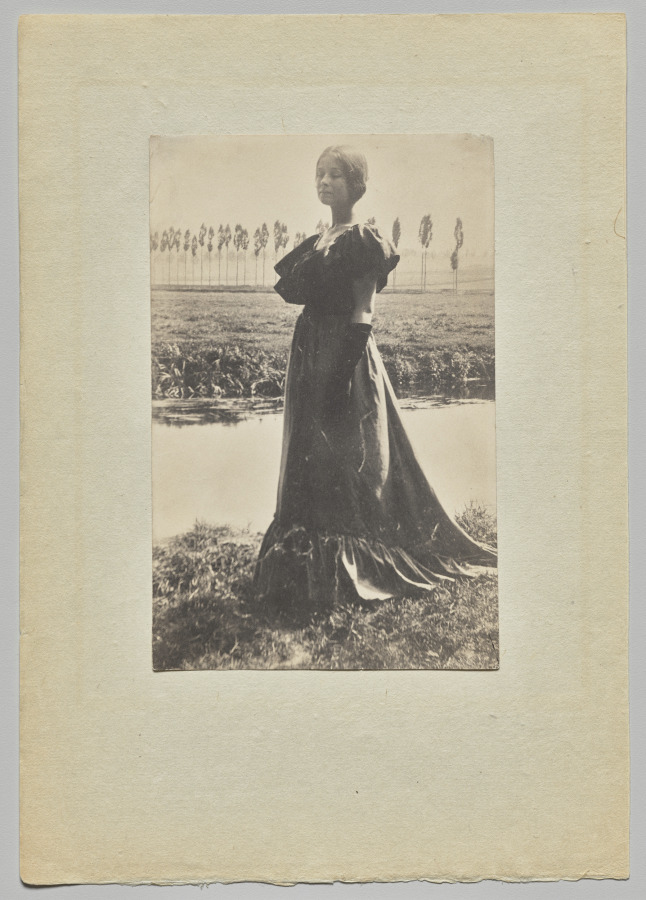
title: Italy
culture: America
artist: Gertrude Käsebier (American, 1852–1934)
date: c. 1889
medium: platinum print mounted to Japanese paper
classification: Photograph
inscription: Written in pencil on verso of photograph: Mar/7 x 10”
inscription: Written in pencil on verso of mount: “Kasebier x 1.08”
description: Italy provides insight into Käsebier’s earliest artistic productions. The woman’s pose and central placement emphasize the picture’s formalism and careful construction. Her rigid vertical posture echoes the trees in the background. Soft focus, a device borrowed from Pictorialist photography, frustrates a clear view of her features, suggesting that the image is neither portrait nor snapshot but a symbolic statement about womanhood and its association with nature.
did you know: Gertrude Käsebier did not begin to study art until she was 37 and had 3 adolescent children.